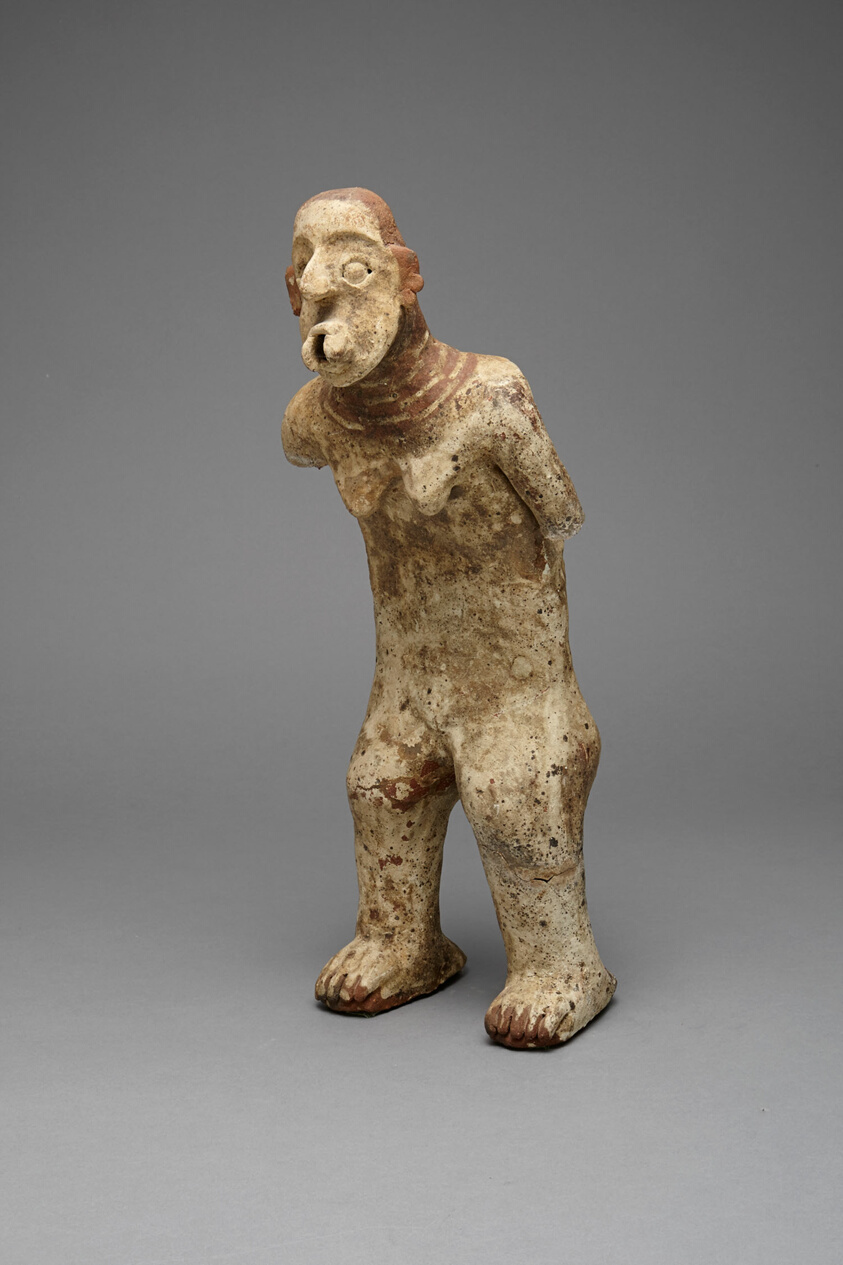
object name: Sculpture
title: Standing Female Figure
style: nayarit, mesoamerican, Pre-Columbian, americas, Arts of the Americas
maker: Nayarit (Nayarit, Mexico)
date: c. 200 CE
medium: Ceramic and pigment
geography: Nayarit state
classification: earthenware; art of the americas; ceramics; sculpture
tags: people